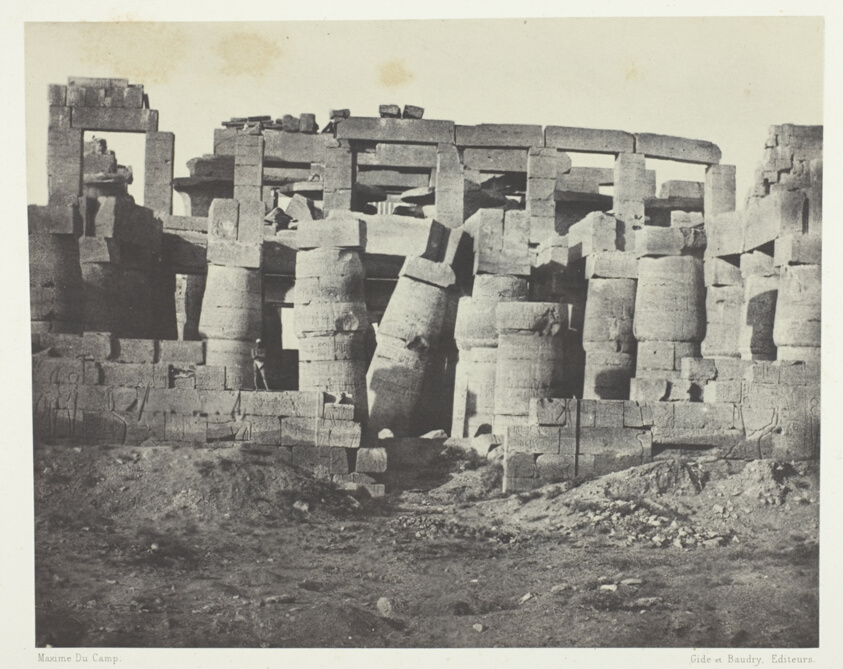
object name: Photograph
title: Palais de Karnak, Salle Hypostyle Prise au Nord; Thèbes, plate 35 from the album "Egypte, Nubie, Palestine et Syrie" (1852)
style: 19th century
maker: Maxime Du Camp (French, 1822–1894)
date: 1849/51, printed 1852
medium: Salted paper print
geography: France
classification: salted paper print; photographic process; photography; photograph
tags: Collected by Hugh Edwards, Egypte, Nubie, Palestine et Syrie